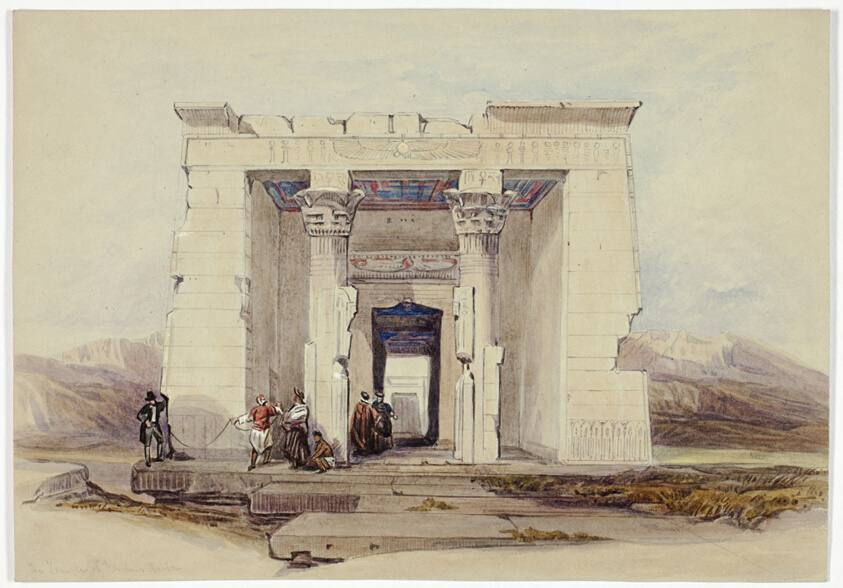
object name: Drawing and Watercolor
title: The Temple of Dendour, Nubia (Dendorack, Upper Egypt)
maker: Possibly after David Roberts; British, 1796-1864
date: 1840/50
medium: Watercolor and gouache, over graphite, on gray wove paper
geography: Scotland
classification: watercolor; drawings (visual works); prints and drawing